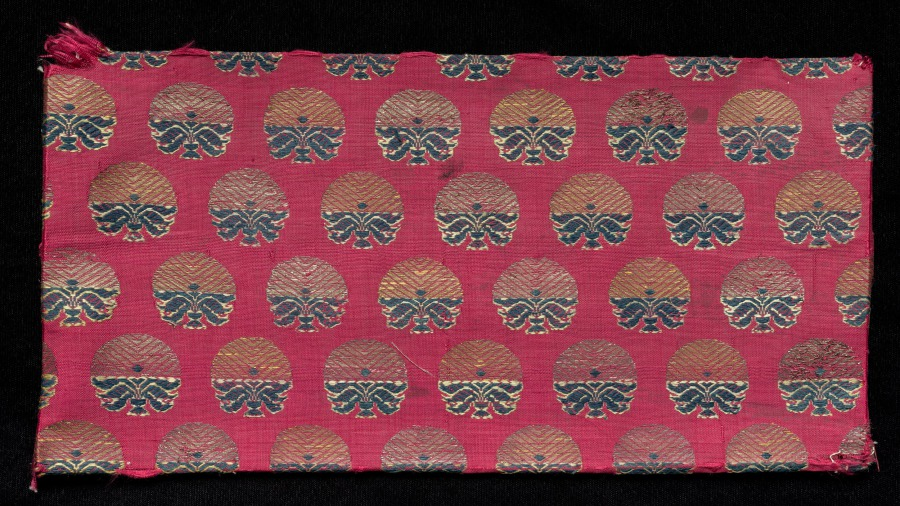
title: Brocaded Book Cover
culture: India, 19th century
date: 1800s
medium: brocade; silk and metal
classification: Textile